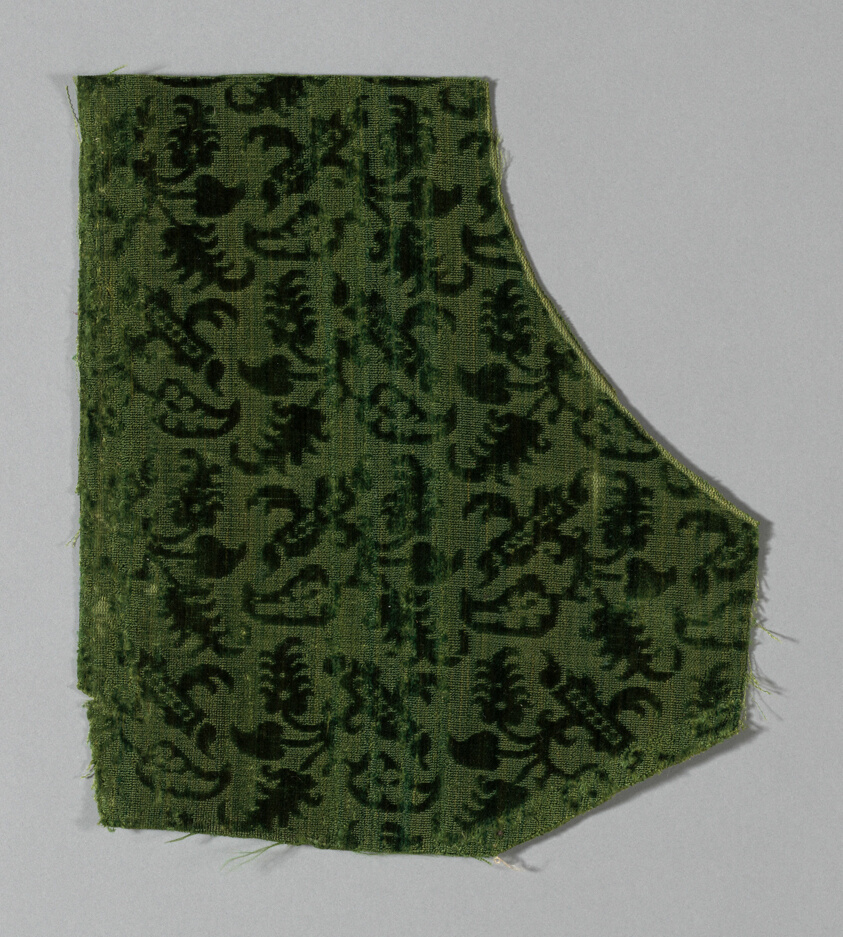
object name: Textile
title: Fragment (Dress Fabric)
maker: Possibly Italy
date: 1600/50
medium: cut and uncut velvet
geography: Italy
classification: textile; weaving - velvet